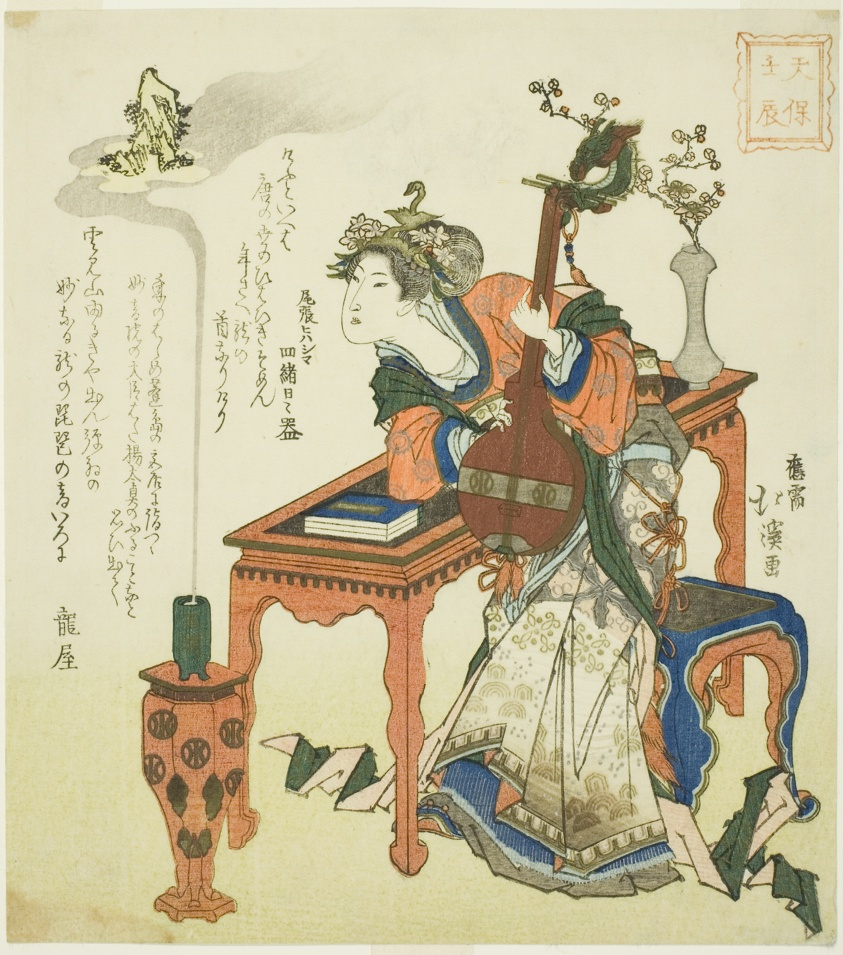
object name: Print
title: The Lesser Water Dragon Year of the Tenpo Era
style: Japanese (culture or style)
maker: Totoya Hokkei (Japanese, 1780–1850)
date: 1832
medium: Color woodblock print; shikishiban, surimono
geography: Japan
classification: woodblock print; print; asian art